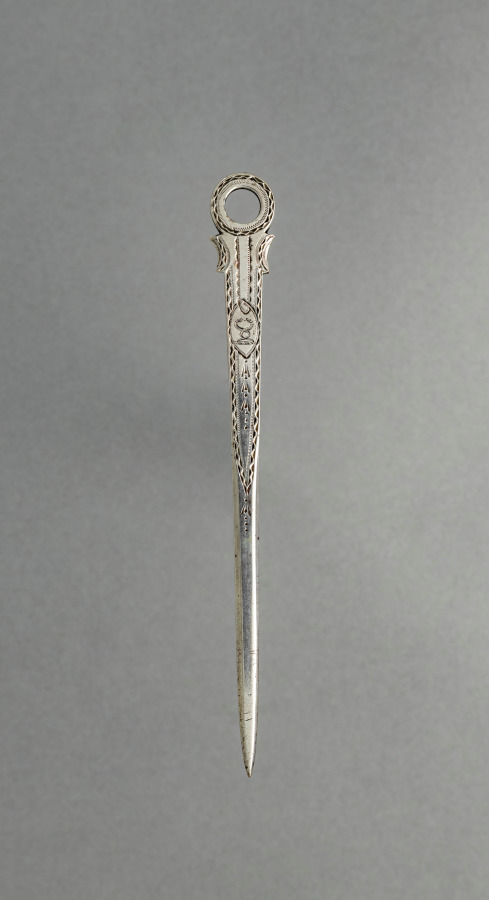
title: Skewer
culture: Ireland, Dublin, 18th century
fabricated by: John Power (Irish)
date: c. 1791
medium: silver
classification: Silver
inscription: engraved crest on one side.